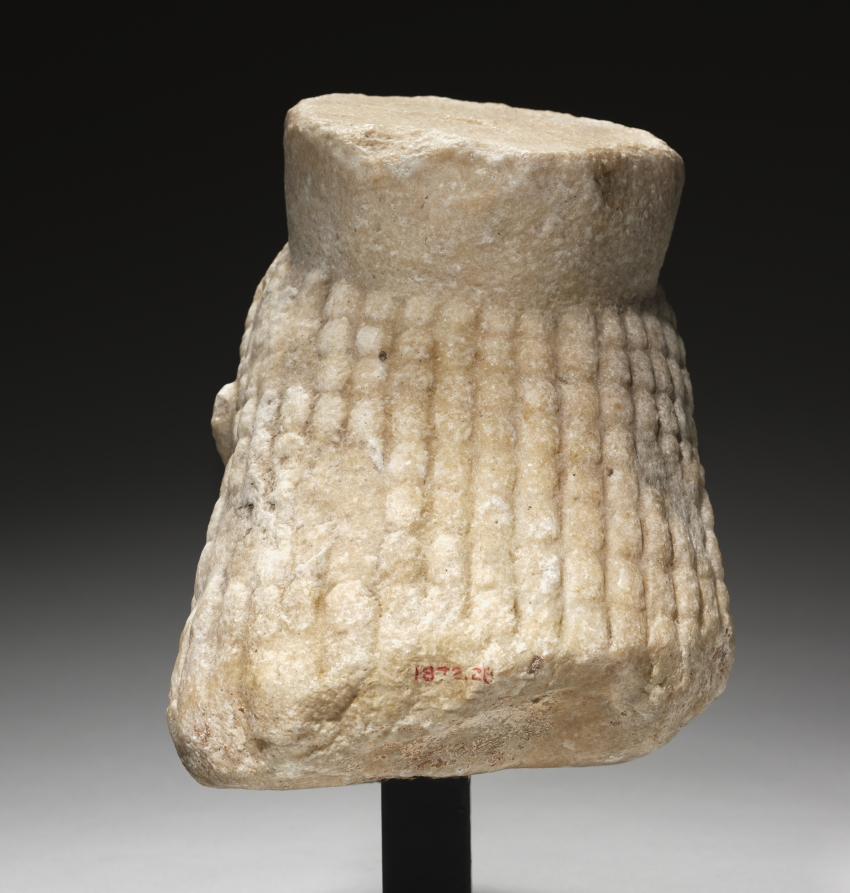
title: Head of a Sphinx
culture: Greece, Archaic period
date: 540–520 BCE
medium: marble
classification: Sculpture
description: This female head once belonged to a sphinx, a mythological hybrid creature with the head of a woman and body of a winged lion. Her short cylindrical crown, known as a polos, helps to identify her as a sphinx, as does the slope of her hair and neck, which once continued onto a feline body. Also common in ancient Egyptian and Near Eastern art (though more often in male form), the sphinx is best known in Greek mythology for devouring passersby who could not answer her riddle outside the Boiotian city of Thebes. Stone sphinxes like this one served as both votive offerings and grave monuments in Archaic Greece.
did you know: Greek sphinxes were often placed on top of columns or grave stelai as guardian figures.